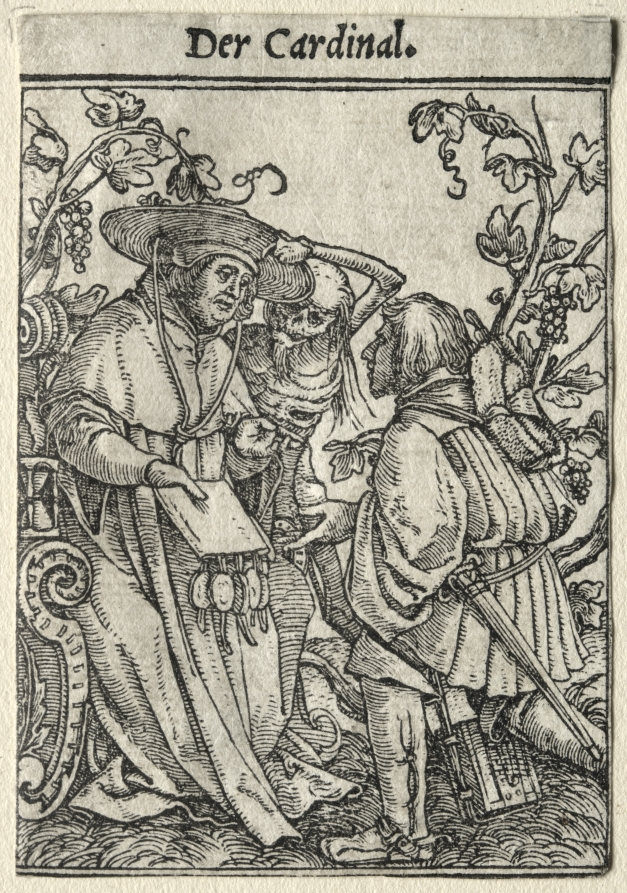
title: Dance of Death: The Cardinal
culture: Germany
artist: Hans Holbein the Younger (German, active England and Switzerland, 1497/98–1543)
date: c. 1526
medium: woodcut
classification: Print